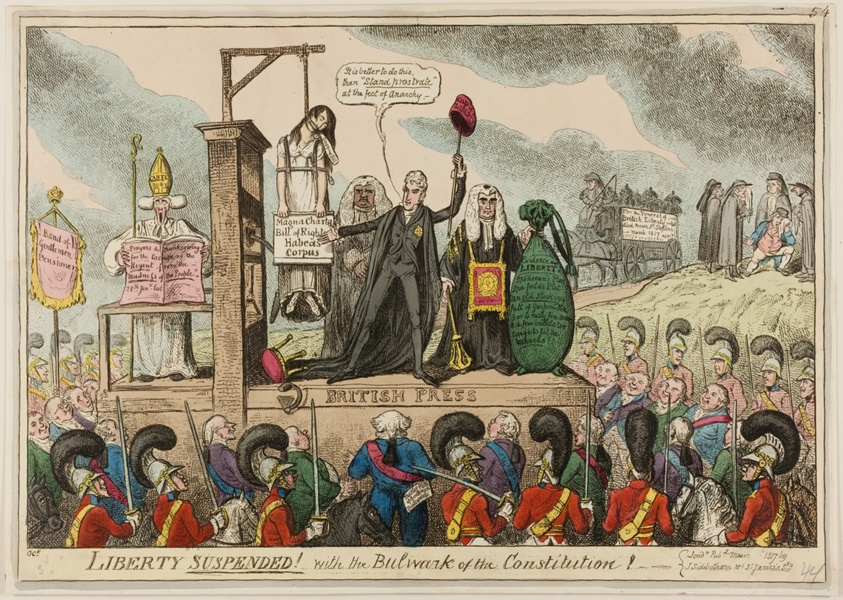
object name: Print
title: Liberty Suspended! With the Bulwark of the Constitution!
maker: George Cruikshank (English, 1792-1878); published by J. Sidebotham (English, active 1802-1820)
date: published March 1817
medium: Hand-colored etching on paper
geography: England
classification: etching; print; prints and drawing